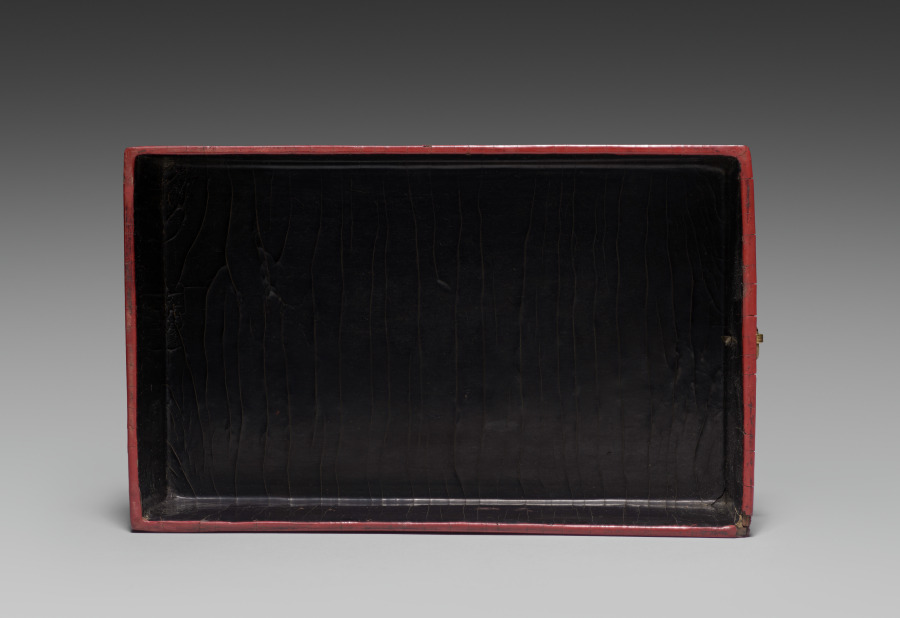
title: Drawer for a Tihong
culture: China, Ming dynasty (1368-1644), Wanli reign (1572-1620)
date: 1585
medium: carved cinnabar lacquer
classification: Lacquer